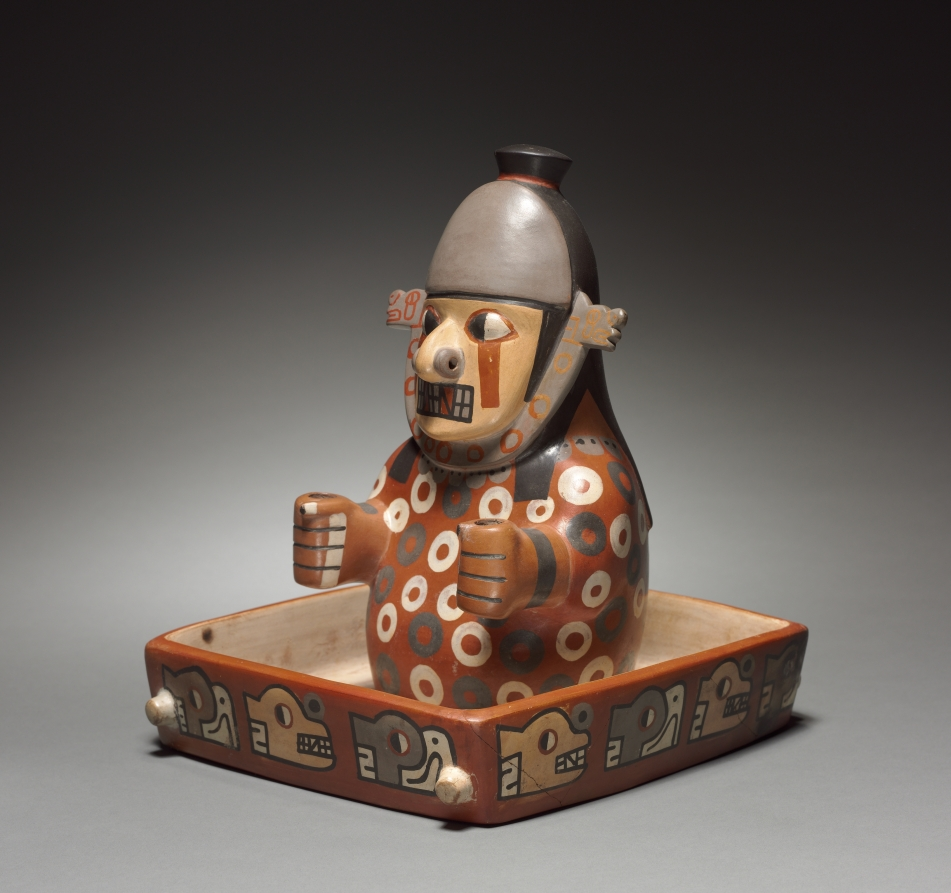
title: Figure in a Litter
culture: Wari (Pachacamac) style, Middle Horizon, Epoch 2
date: 500–900 (Thermoluminescence date, 590–1090)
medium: earthenware with colored slips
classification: Ceramic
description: Whether a deity, ancestral mummy, or masked human, this figure signals power. The divided eyes and fangs are traits of supernatural beings. The hands are cupped around holes that once perhaps held staffs, symbols of human and divine authority. And the litter was a mode of travel reserved for those of high station; the knobs refer to poles that rested on the shoulders of human bearers.